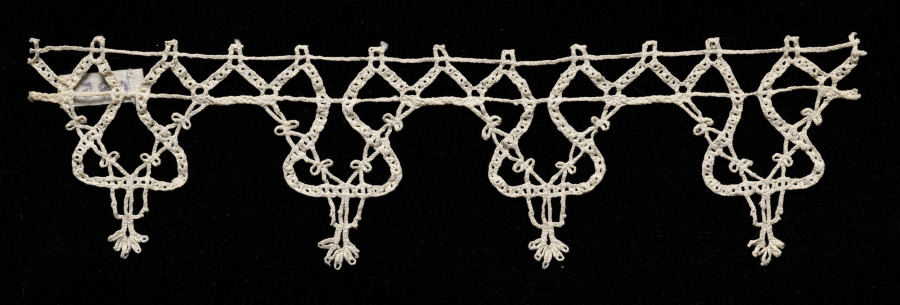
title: Lace Edging with Points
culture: Italy, Venice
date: 1540–60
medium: Bobbin lace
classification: Lace